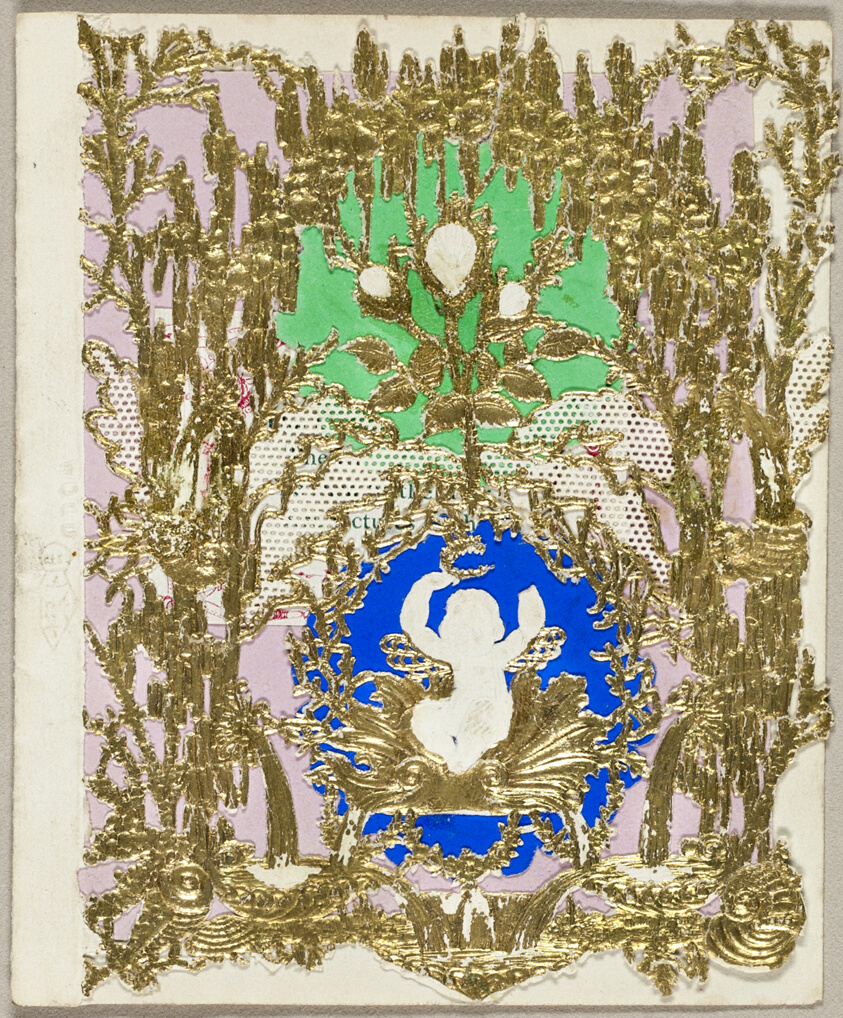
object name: Drawing and Watercolor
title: Untitled Valentine (Cupid Enthroned)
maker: Thomas Wood (English, 19th century)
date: 1860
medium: Gold paint and collaged elements on cut and embossed (designed) ivory wove paper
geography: England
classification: collage; valentine; prints and drawing; paper